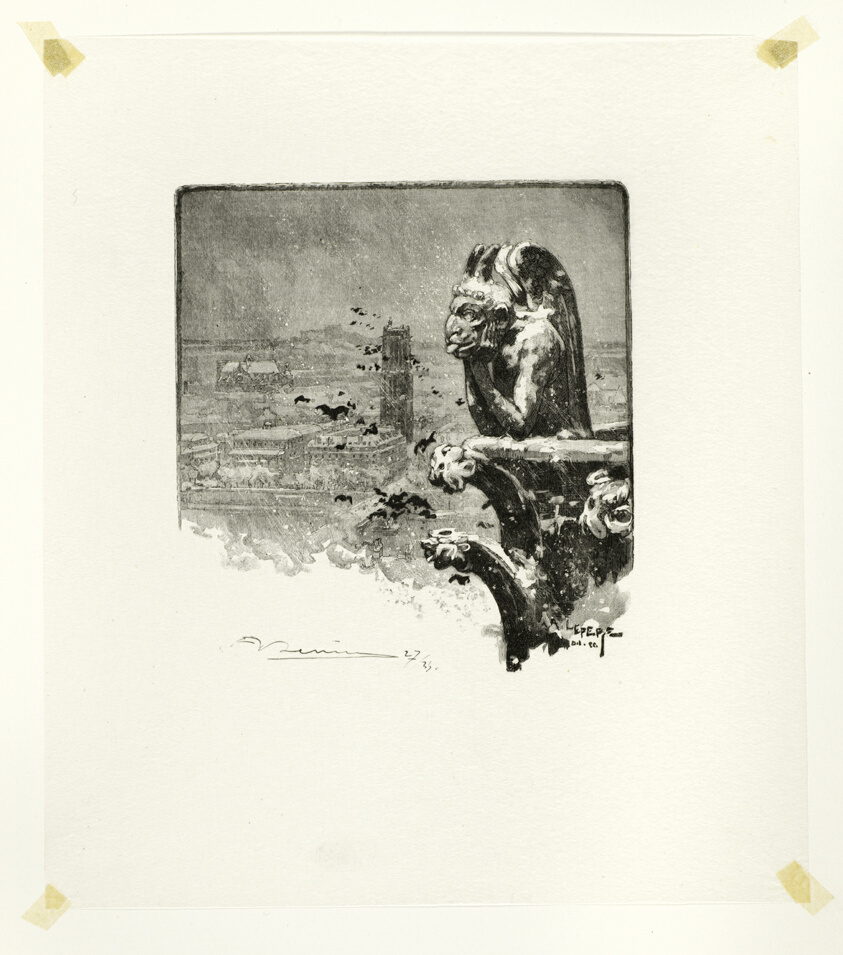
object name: Print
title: The Vampire of Notre-Dame, plate nine from Le Long de la Seine et des Boulevards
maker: Louis Auguste Lepère (French, 1849-1918); published by A. Desmoulins (French, active c. 1908-1910)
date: 1890, published 1910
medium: Wood engraving in black on cream Japanese tissue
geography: France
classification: wood engraving; paper; print; prints and drawing